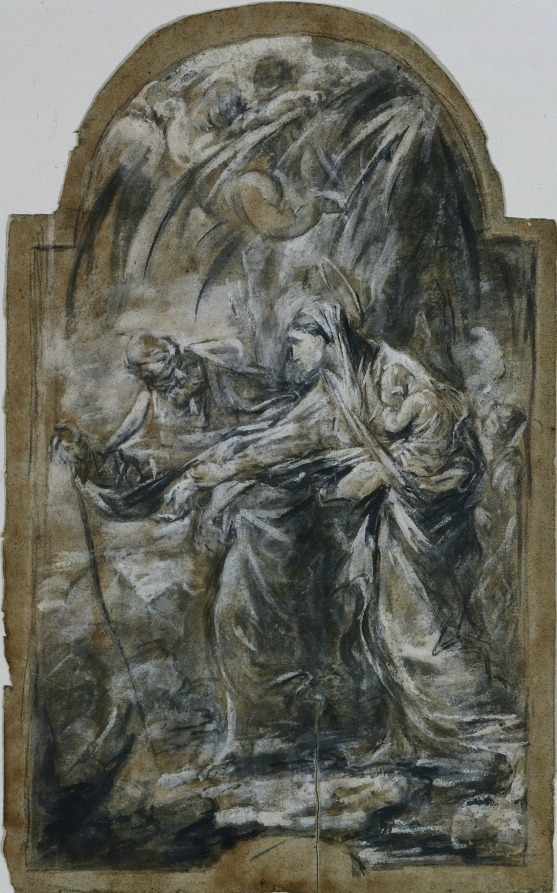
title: Flight into Egypt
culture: Italy, 18th century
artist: Alessandro Magnasco (Italian, 1667–1749)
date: 1740s?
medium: black, white and gray gouache; framing lines in black chalk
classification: Drawing